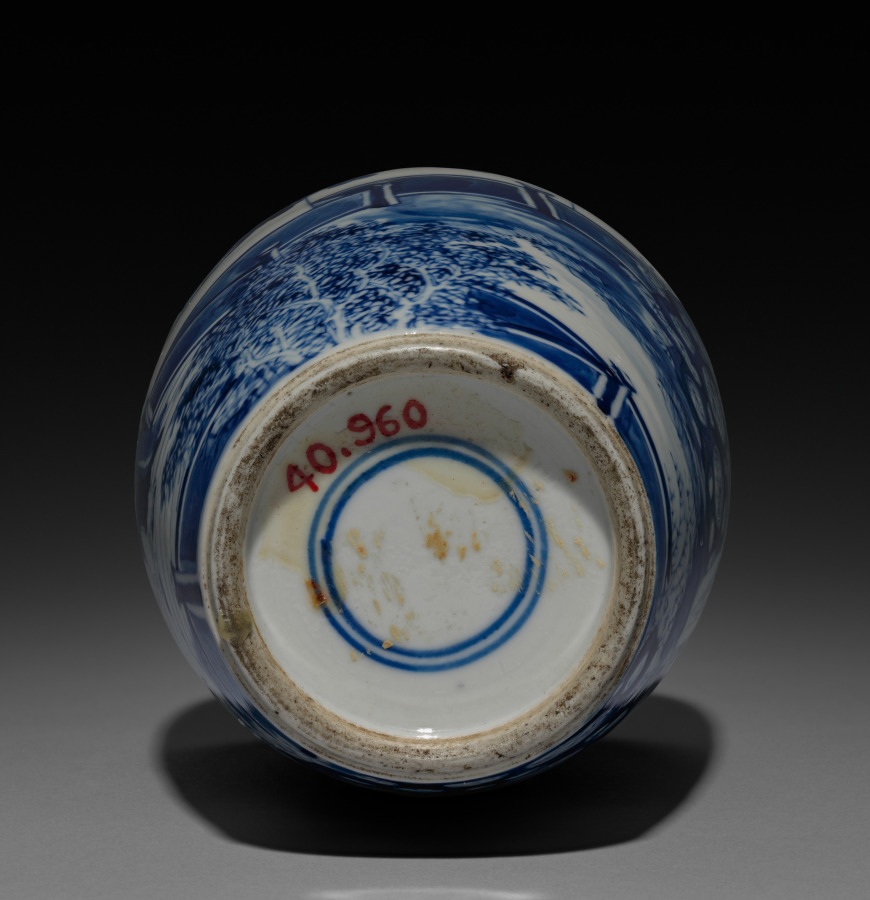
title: Vase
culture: China, Qing dynasty (1644-1911), Kangxi reign (1661-1722)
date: 1662–1722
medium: porcelain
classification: Ceramic